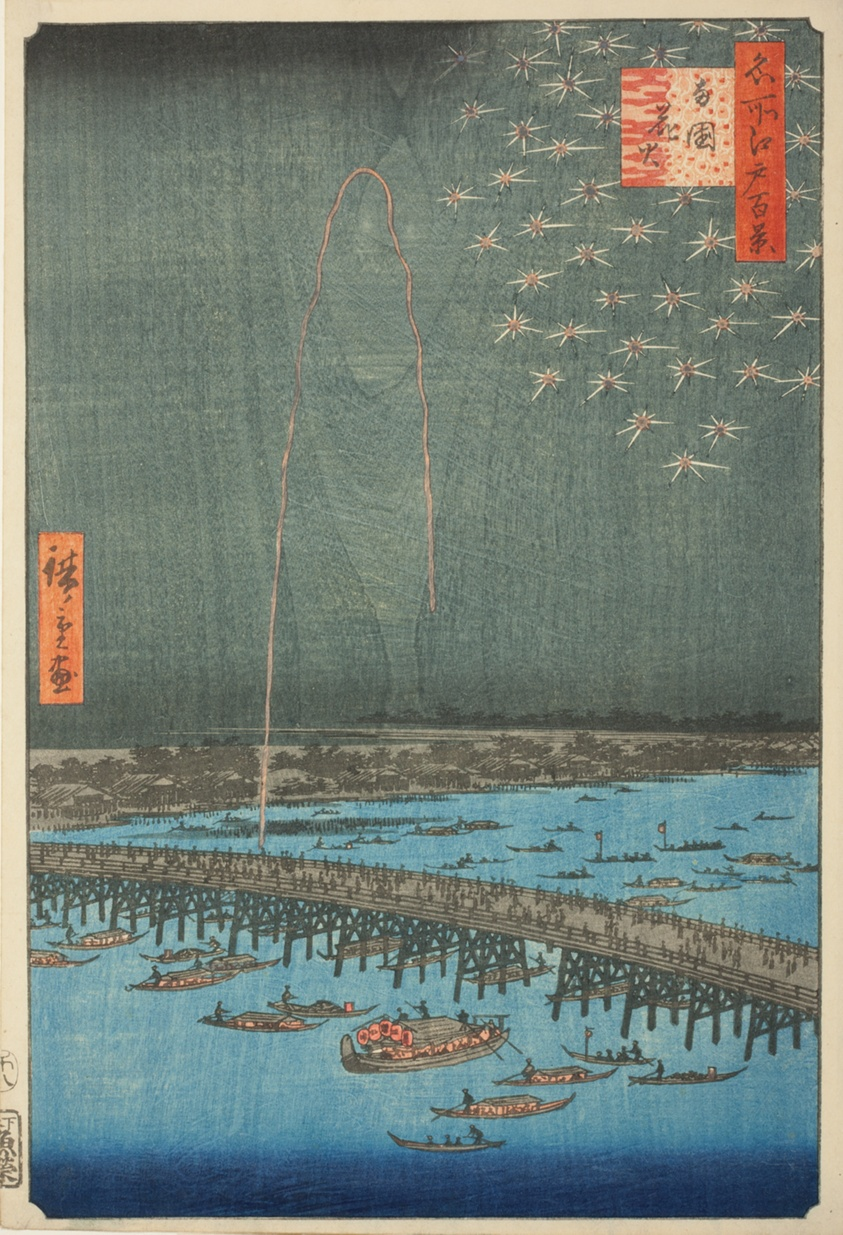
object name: Print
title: Fireworks at Ryōgoku (Ryōgoku hanabi), from the series One Hundred Famous Views of Edo (Meisho Edo hyakkei)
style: Japanese (culture or style)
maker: Utagawa Hiroshige 歌川 広重; Japanese, 1797-1858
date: 1858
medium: Color woodblock print; oban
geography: Japan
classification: woodblock print; print; asian art